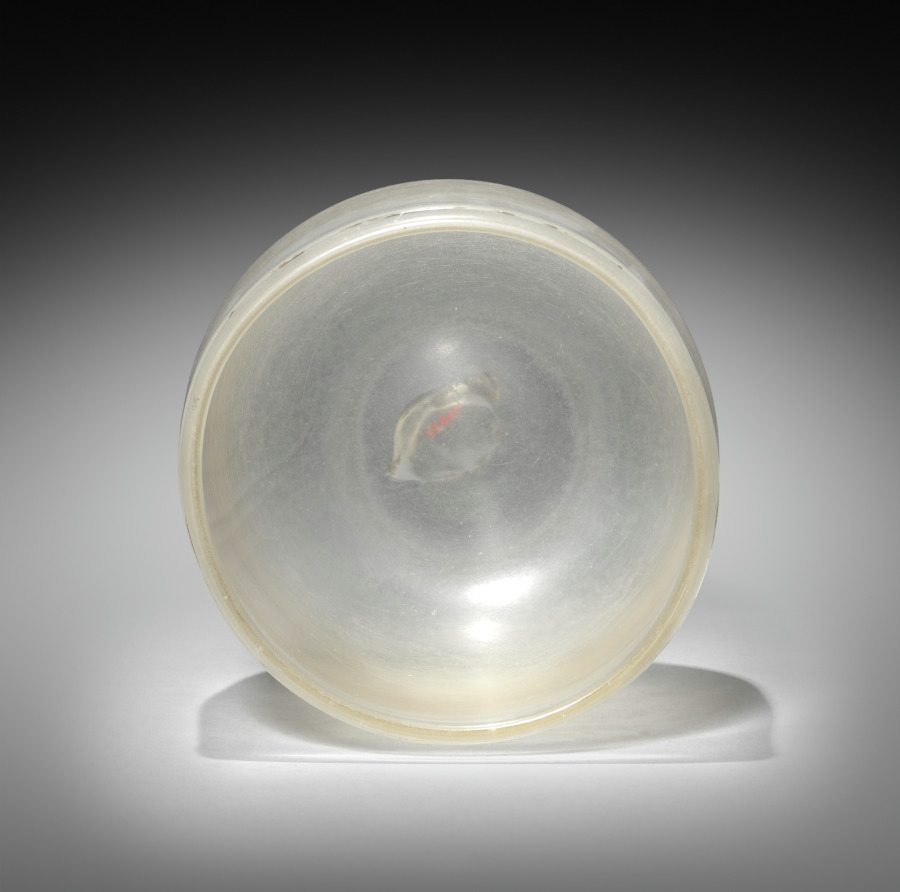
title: Bowl with Stand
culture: Syria, Roman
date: 100–400 CE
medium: glass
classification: Glass